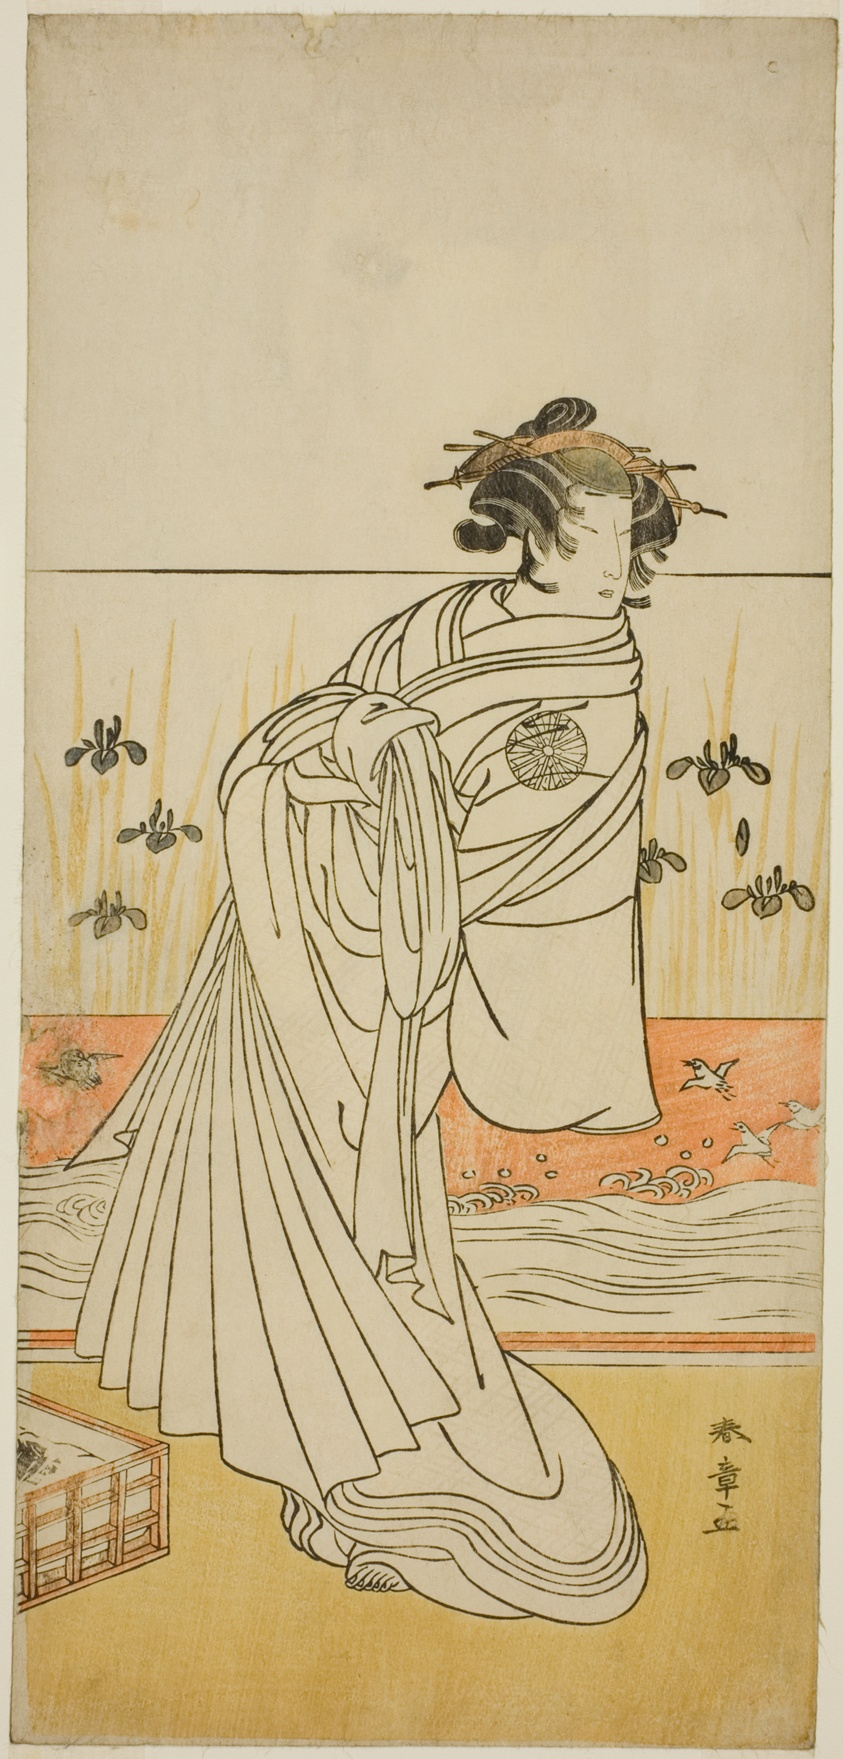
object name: Print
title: The Actor Nakamura Tomijuro I as the Courtesan Toyama in the Play Koi Nyobo Somewake Tazuna, Performed at the Nakamura Theater in the Ninth Month, 1777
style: Japanese (culture or style)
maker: Katsukawa Shunsho 勝川 春章; Japanese, 1726-1792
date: c. 1777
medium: Color woodblock print; hosoban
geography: Japan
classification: woodblock print; print; asian art